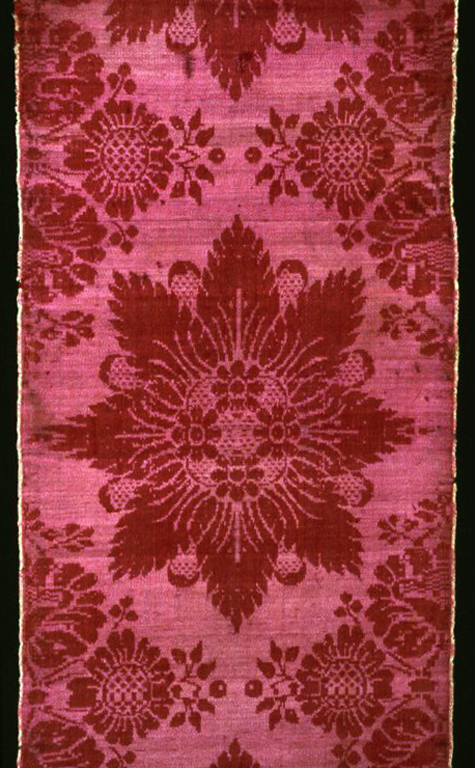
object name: Textile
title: Panel (Furnishing Fabric)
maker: Italy or Netherlands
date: c. 1700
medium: Wool, 4:1 satin damask weave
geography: Italy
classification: textile; weaving; furnishing textile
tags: flowers